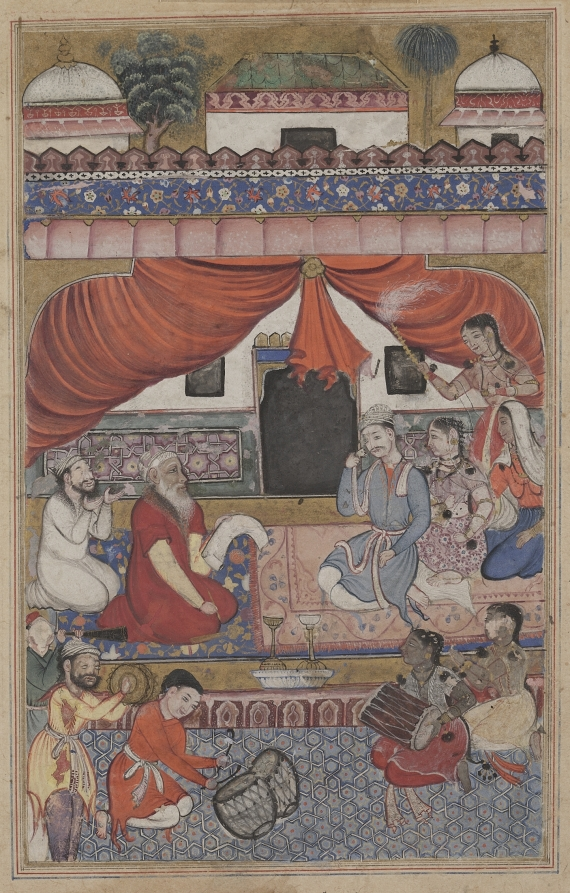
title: Preparation for the marriage of Mahmuda to the Young Vizier, from a Tuti-nama (Tales of a Parrot): Thirty-third Night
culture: Mughal India, court of Akbar (reigned 1556–1605)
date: c. 1560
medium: gum tempera, ink, and gold on paper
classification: Painting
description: In the lower register of this bustling scene, musicians play in celebration of the impending wedding. Above, the betrothed couple sits at the right. Although Mahmuda was happily engaged to her childhood sweetheart, Ayaz, the young vizier wanted her for himself. Mahmuda’s father, the grand vizier, agrees to the arrangement. Heartbroken, Ayaz believes he has lost Mahmuda forever.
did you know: Mahmuda’s name means “praised” or “blessed.”